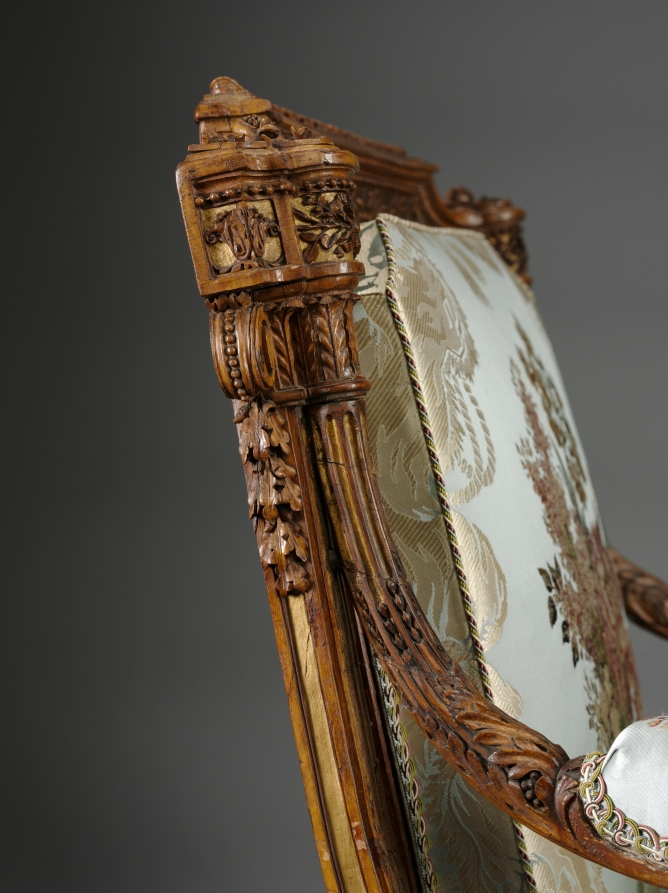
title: Armchair (Fauteuil) (2 of 2)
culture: France, 18th century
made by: Nicolas-Denis Delaisement (French)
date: c. 1785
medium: boxwood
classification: Furniture and woodwork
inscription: signed on front and back of frame of seat underneath: Delaisement with inverted "s."